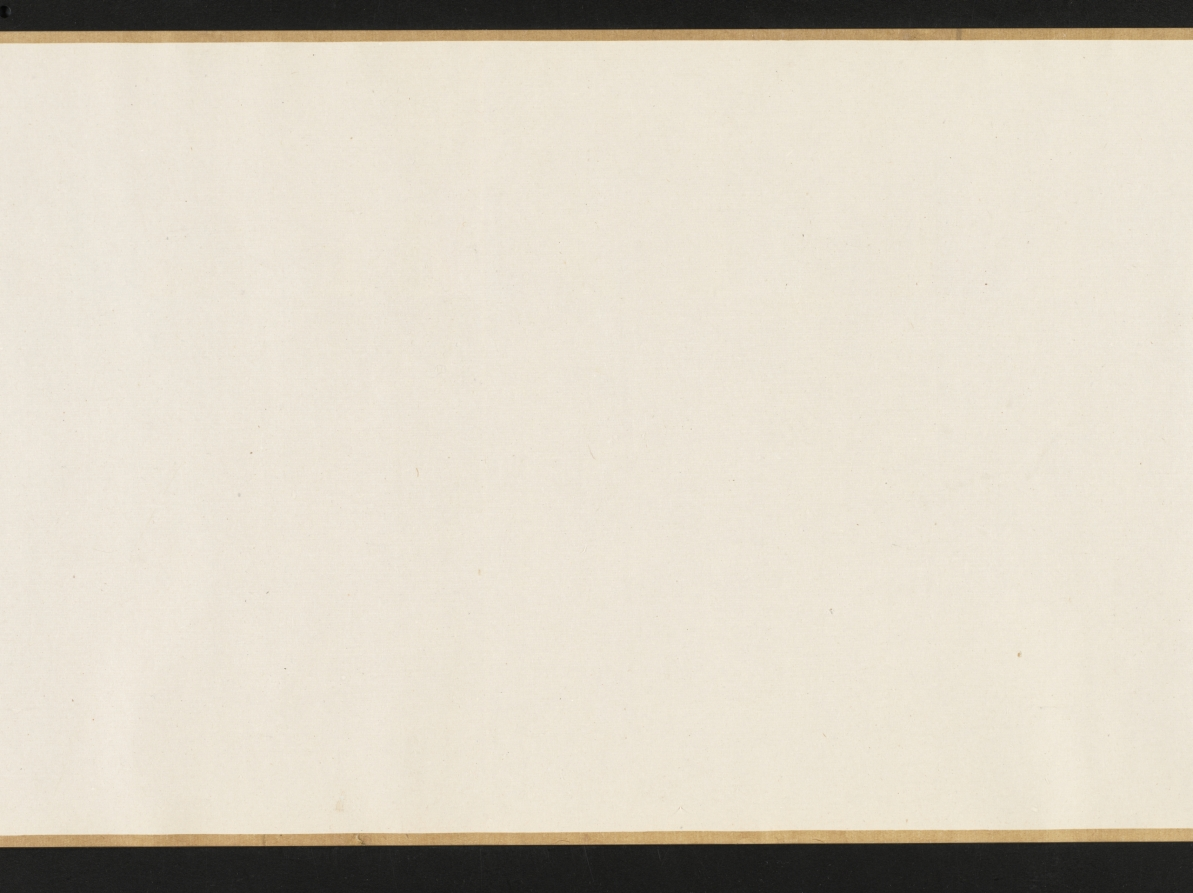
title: The Lantern Night Excursion of Zhong Kui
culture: China, Yuan dynasty (1271-1368)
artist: Yan Hui (Chinese, active 1270–1310)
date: late 1200s–early 1300s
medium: handscroll; ink and slight color on silk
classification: Painting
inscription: Artist's signature [and probable seal]: Yan Qiuyue 顏秋月 Title on frontispiece and 1 seal of Niu Shuyu 鈕樹玉 (1760–1827): Qiuyue mohuan 秋月墨幻 [Qiuyue's Ink Fantasy]. 31 additional seals: 2 of Yang Shiqi 楊士奇 (1365–1444); 2 of An Guo 安國 (1481–1534); 8 of Xiang Yuanbian 項元汴 (1525–1590); 2 of Geng Zhaozhong 耿昭忠 (1640–1686); 4 of Pu Tung 溥侗 (1870–1952); 7 of Tan Jing 譚敬 (1911–1991); 1 of Liu Ting-chih (20th c.); 5 unidentified.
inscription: An inscription by Zizhi Shanren 紫芝山人 [probably Jiang Hui 蔣惠], dated 1389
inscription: An inscription by Wu Kuan 吳寬 (1436–1504)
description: Here, the demon queller Zhong Kui leads a nightly procession of street entertainers with bare, muscular bodies and demonic faces. Some wear shabby clothes, and all perform stunts and tricks to astound and scare the viewer. In fact, a New Year custom in cities of southeast China had the poor, disguised as demons, process through the streets and play their tricks to clear households of evil spirits and welcome the spring. From right to left, a demonic figure leads the procession and beats a drum; another lifts a large rock; one stands on his hands trying to drink; one balances a jar on his elbow; three hold and wield weapons; one carries a folded chair covered by a cow’s skin; another holds Zhong Kui’s qin (zither), books, brush, and inkstone. At the end of the scroll, two figures offer a cup and bottle of wine to Zhong Kui, who lifts his hand in command.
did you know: Zhong Kui was an ancient ghostbuster.